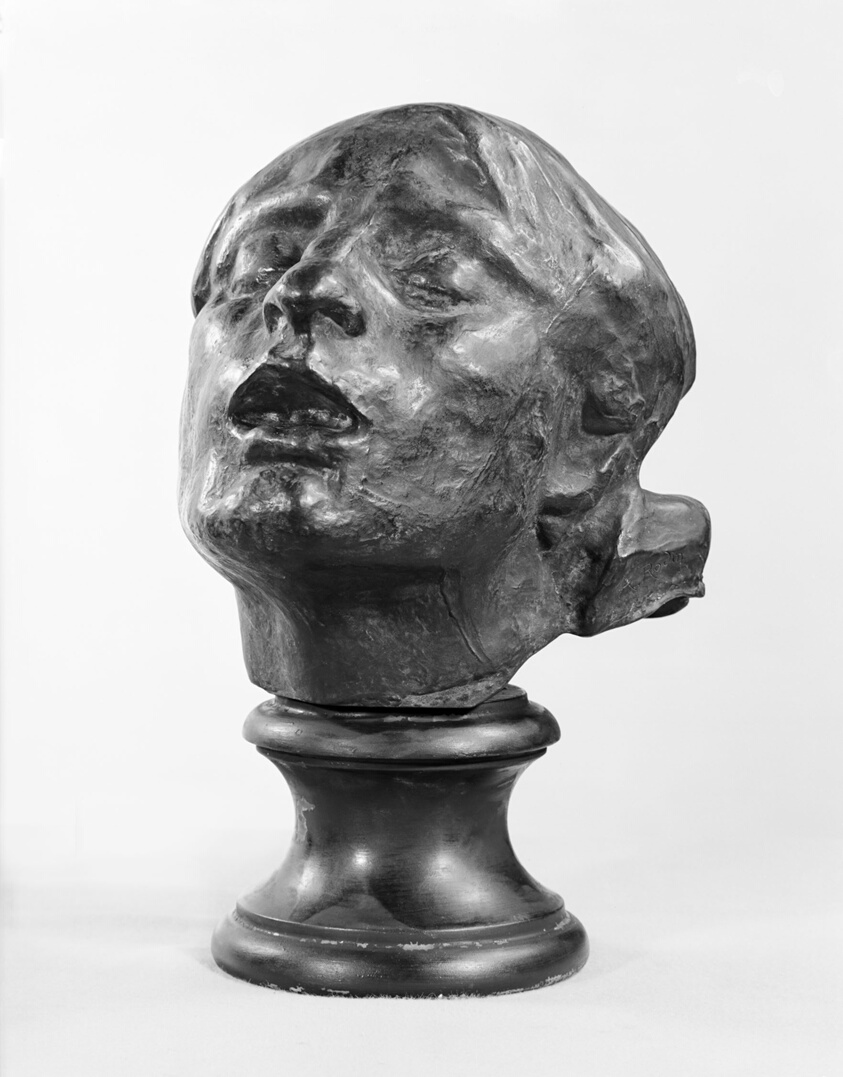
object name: Sculpture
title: Sorrow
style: nineteenth century, 19th century, 20th Century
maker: Auguste Rodin (French, 1840–1917)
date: Modeled 1882, cast c. 1913–23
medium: Bronze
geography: France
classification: bust/head; sculpture; french; bronze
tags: head, faces, woman